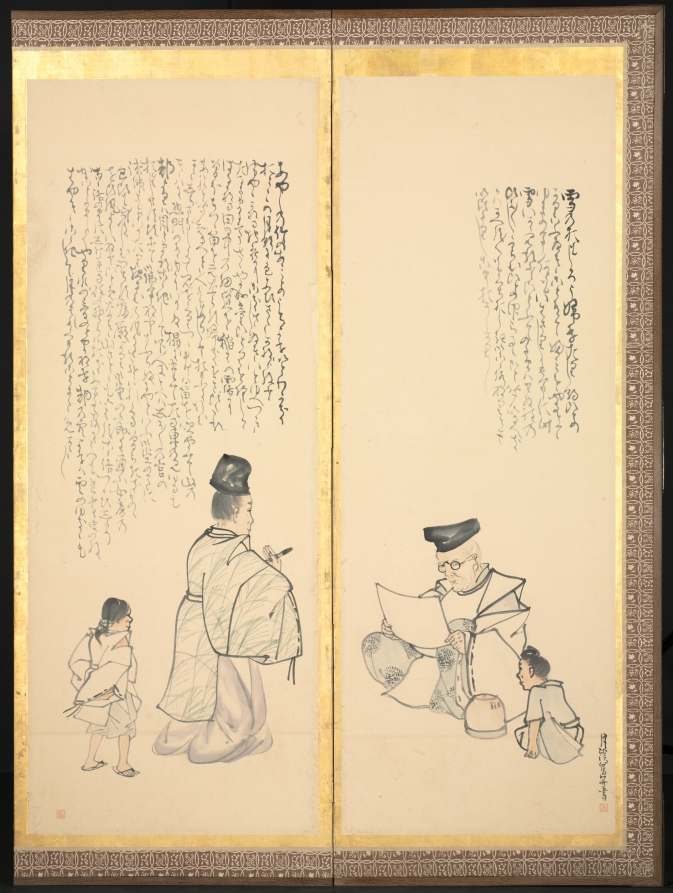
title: Scenes from Essays in Idleness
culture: Japan, Edo period (1615–1868)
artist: Matsumura Goshun (Japanese, 1752–1811)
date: late 1700s–early 1800s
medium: One of a pair of six-panel folding screens; ink and color on paper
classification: Painting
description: Matsumura Goshun inscribed passages from Buddhist monk Yoshida Kenkō’s (1283–1350) well-known collection of anecdotes, Essays in Idleness, across the top of the panels of this screen and its pair. Goshun illustrated the narratives with his vision of the figures who feature in them. The texts cascade down from right to left, forming unique compositional relationships with the images below. The episodes offer a veritable portrait of human idiosyncrasy, from one man’s deep faith in radishes to another’s inability to avoid nicknames.